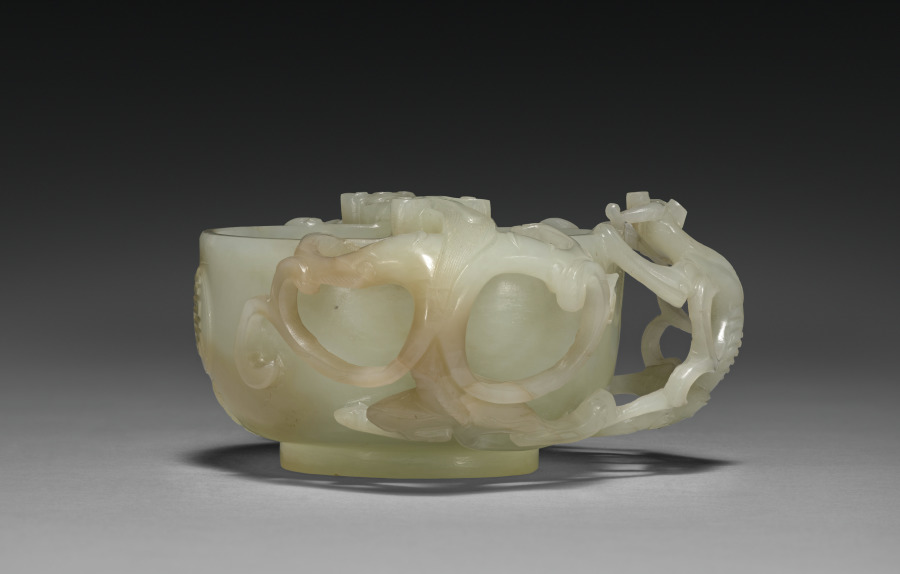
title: Cup with Dragon Handles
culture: China, Qing dynasty (1644-1911), Kangxi reign (1662-1722)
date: 1662–1722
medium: Pale gray-green white jade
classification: Jade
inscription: 萬壽長春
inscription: 壽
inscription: 子剛造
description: Three dragons, auspicious symbols for good fortune, grasp the rim of this bowl. A large shou (longevity) character is visible on the outside wall. Drinking cups with dragon handles were elite luxuries. The yellowish-white color and refined techniques are characteristic of Suzhou workshops that served the court, scholar-officials, and the merchant class. The optimistic attribution to Lu Zigang (late 1500s), a jade master recorded to have been active in Suzhou, suggests that its maker used the master’s name to attract wealthy clients eager to demonstrate their refined taste and connoisseurship.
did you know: Auspicious inscriptions on the base and front of the jade cup convey wishes for longevity.